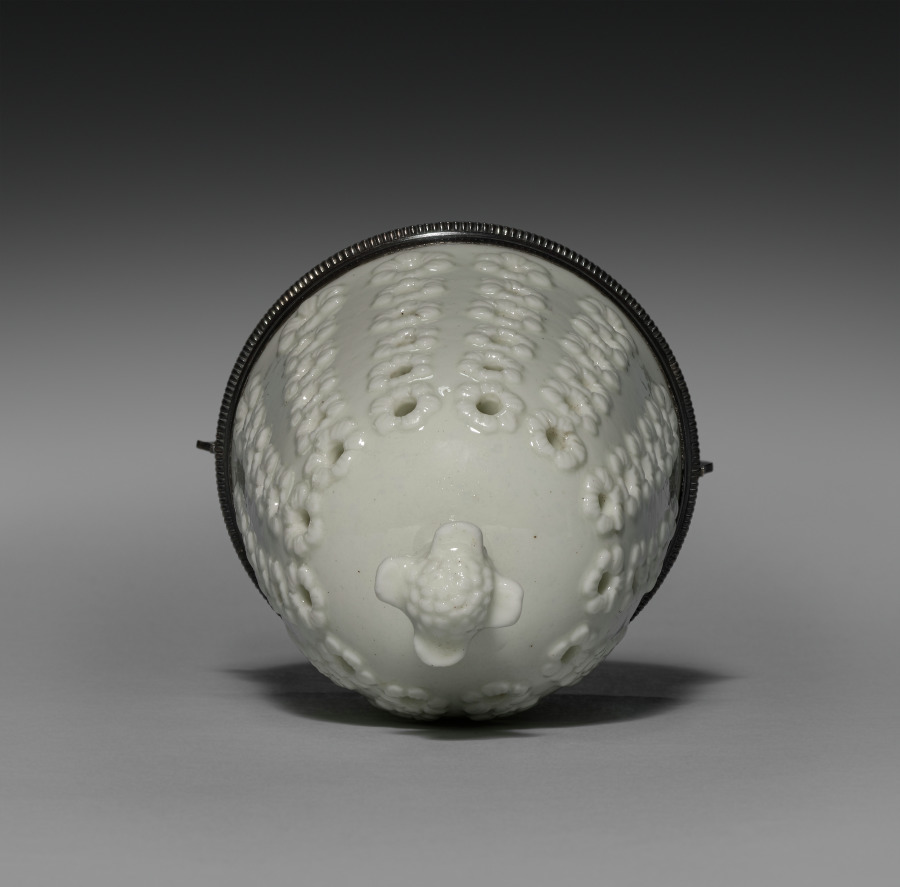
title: Sugar Caster (cover)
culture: France, Saint Cloud, 18th century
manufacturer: Saint Cloud Porcelain Factory (French)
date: c. 1732– 1738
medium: soft-paste porcelain, silver mount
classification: Ceramic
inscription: [Discharge mark of Hubert Louvet, 1732-1738 (Dog's head in profile), on both sections of silver mount]